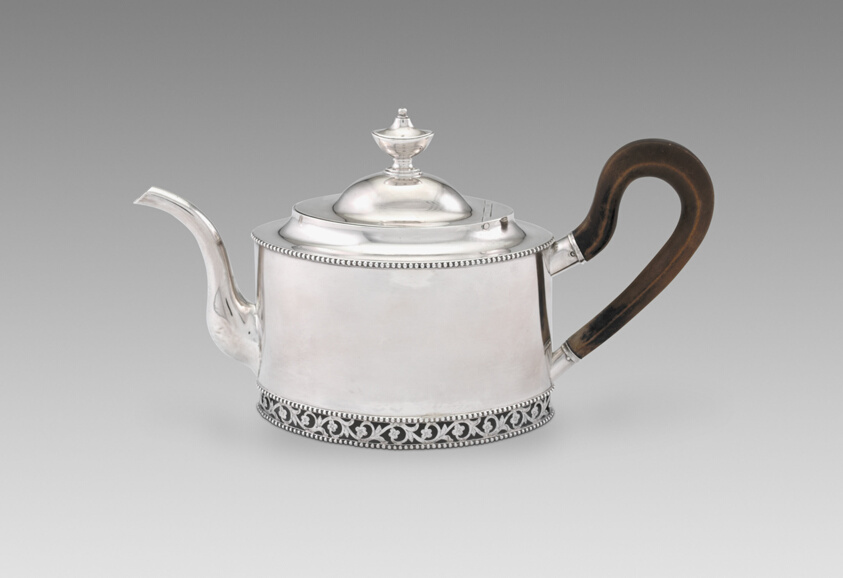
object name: Metalwork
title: Teapot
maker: Standish Barry; American, 1763–1844; Baltimore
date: 1784–1800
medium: Silver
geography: Baltimore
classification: teapot; silver; american decorative arts; american arts; decorative arts